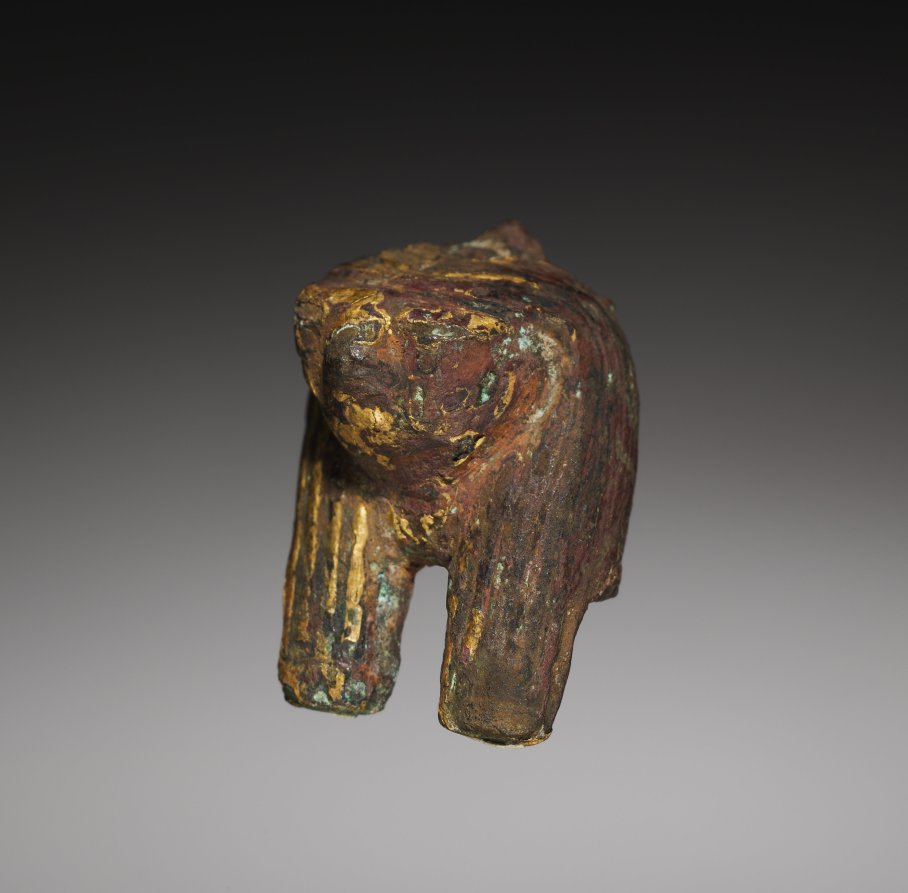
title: Falcon's Head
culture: Egypt, New Kingdom (1540–1069 BCE), Dynasties 18–19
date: 1350–1250 BCE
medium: face of bronze inlaid with gilt copper, wig of black copper (?) with copper striations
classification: Sculpture